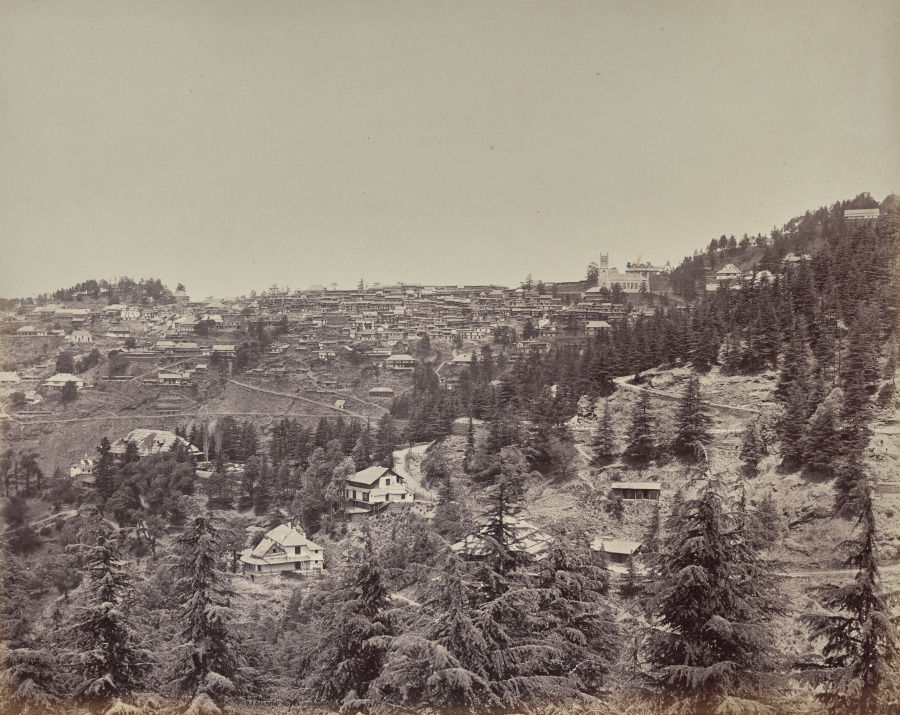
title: Shimla. View from Oakover House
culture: England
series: Photographs of Northern India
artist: Samuel Bourne (British, 1834–1912)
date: 1863–70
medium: albumen print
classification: Photograph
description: The 50 images in this album, all taken in the 1860s, move from the hill towns of the Himalayas down to cities including Lahore (now in Pakistan), Delhi, Lucknow, Agra, Benares (now Varansi), and Calcutta (now Kolkata). Architectural studies of major monuments offer valuable historical records of what sites such as the Taj Mahal and the imperial mosque of the Mughal emperors in Delhi looked like before 20th-century restorations.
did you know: Samuel Bourne, the author of most the images in this album, was a banker in England before he moved to India to become a professional photographer.